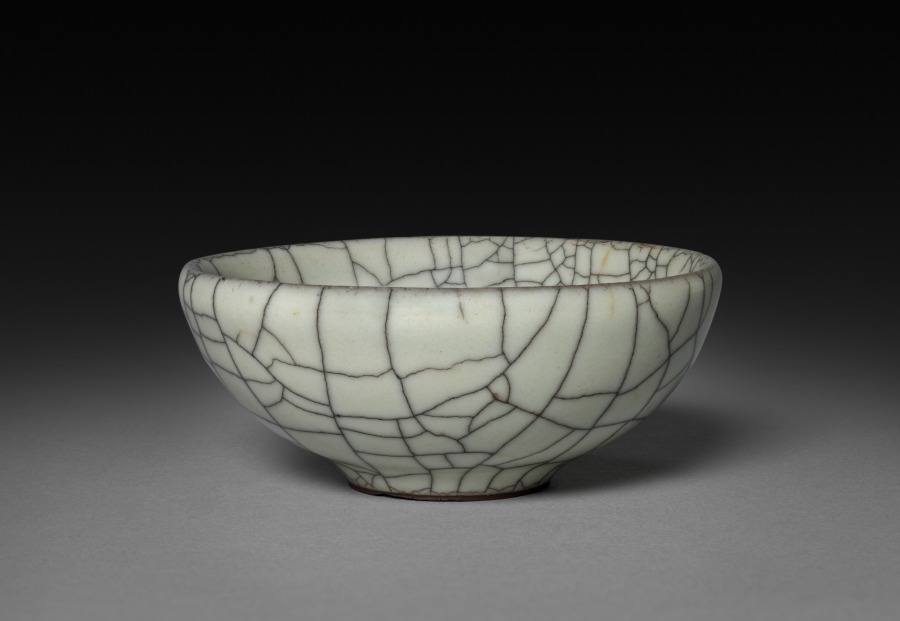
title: Wine Cup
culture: China, Song dynasty (960-1279)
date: 960–1279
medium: Glazed dark brown stoneware, Guan ware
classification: Ceramic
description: Wine was often served hot in porcelain cups that could also be used in popular drinking games.